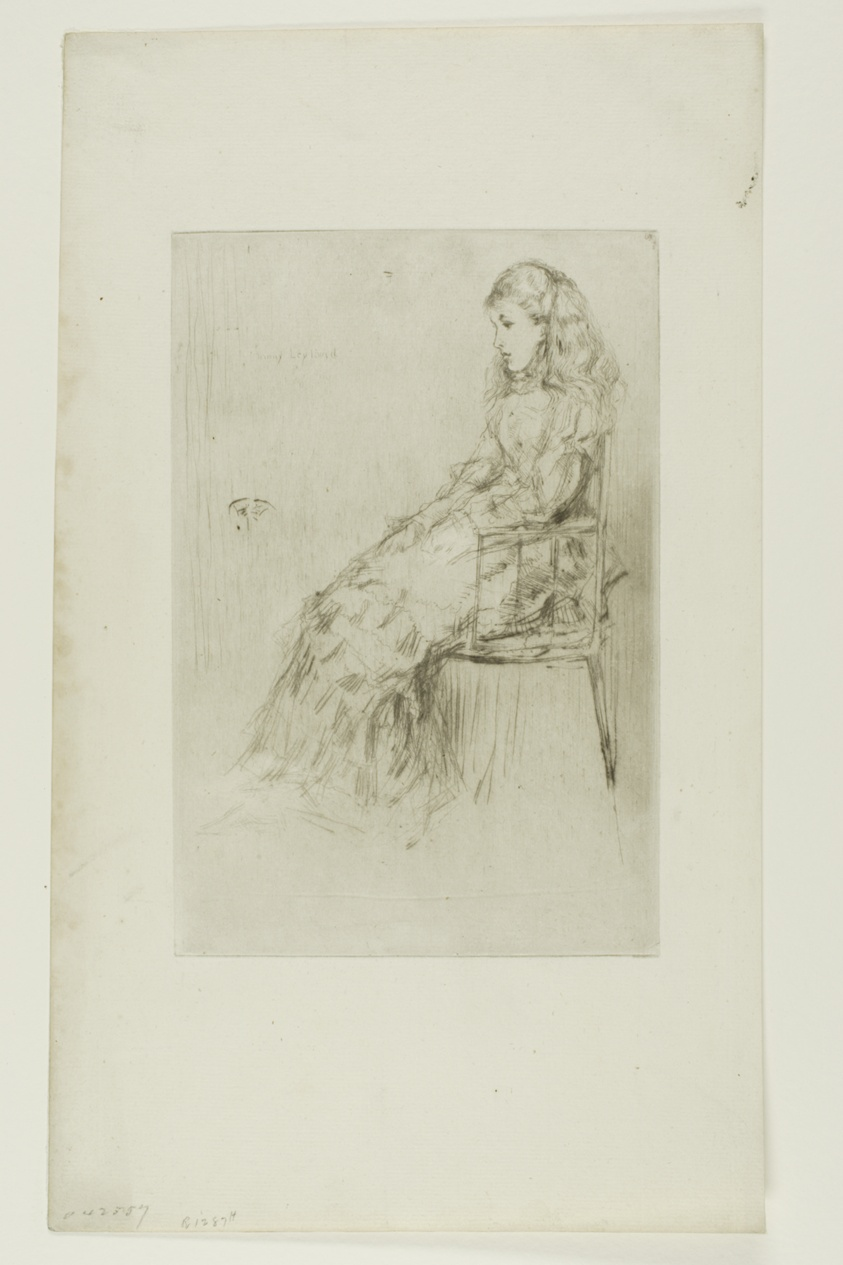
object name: Print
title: Fanny Leyland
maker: James McNeill Whistler (American, 1834-1903)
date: 1874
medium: Drypoint in black ink on ivory laid paper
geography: United States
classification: drypoint; print; prints and drawing; paper